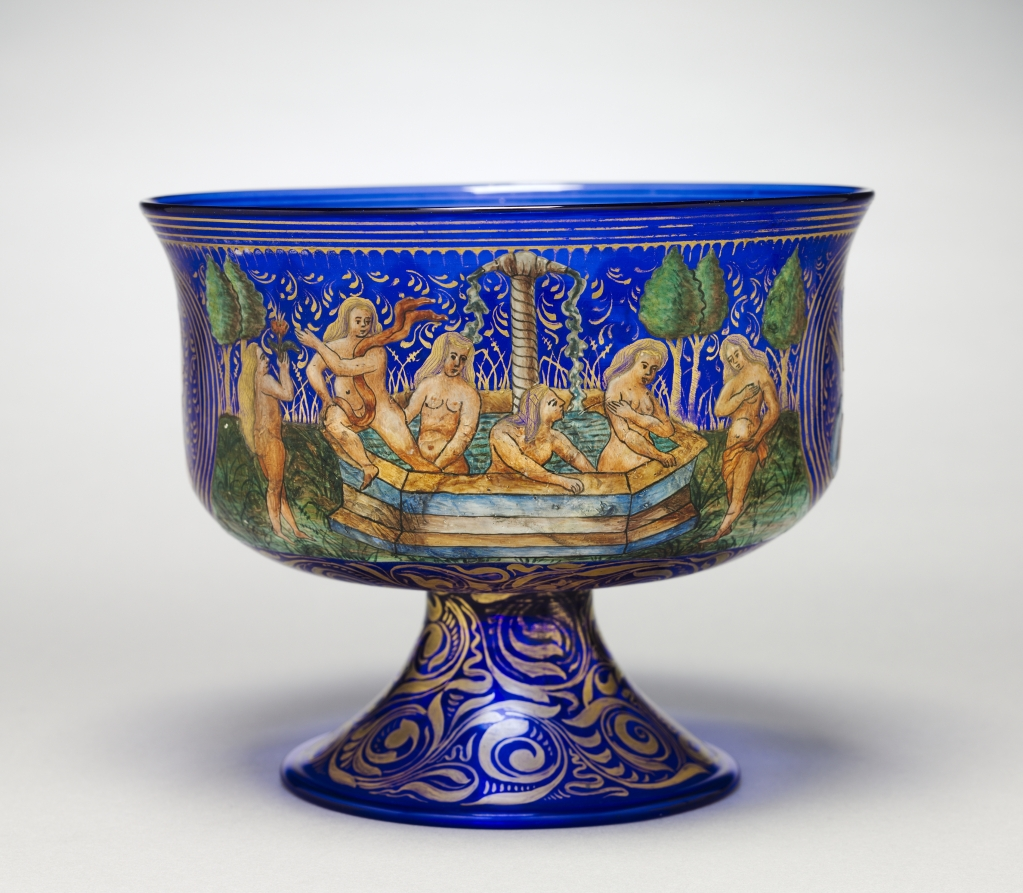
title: Footed Bowl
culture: Italy, Venice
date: 1850–99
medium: glass decorated with polychrome enamel and gilt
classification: Glass